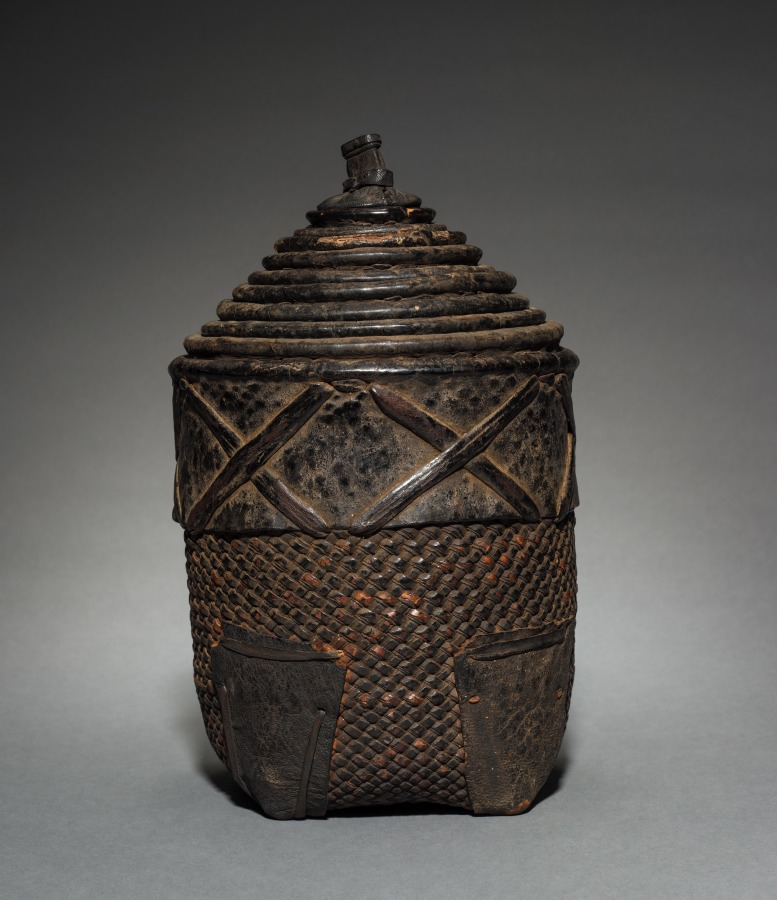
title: Set of Nesting Wedding Baskets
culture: Africa, Western Sudan, Burkina Faso, Lobi, 20th century (?)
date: c. 1900s ?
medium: Plant fiber and leather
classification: Vessels